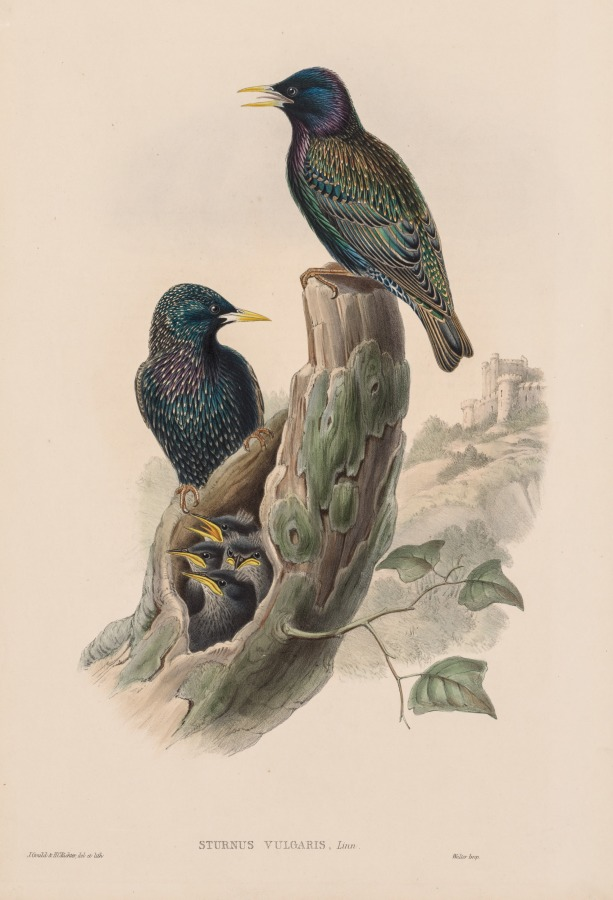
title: Sturnur Vulgaris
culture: England, 19th century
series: The Birds of Great Britain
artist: John Gould (British, 1804–1881)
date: 1873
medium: lithograph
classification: Print